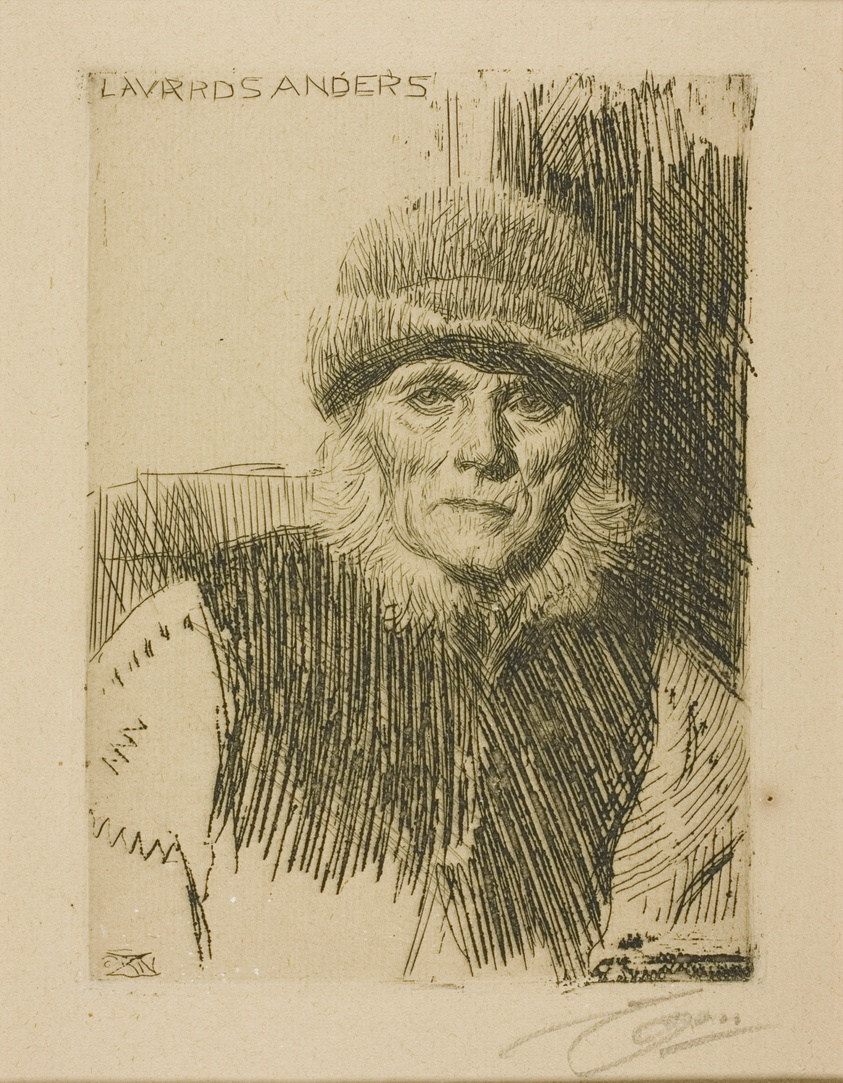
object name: Print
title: Dalecarlian Peasant (Lavards Anders)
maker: Anders Zorn (Swedish, 1860-1920)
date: 1919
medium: Etching on tan laid paper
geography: Sweden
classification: etching; print; prints and drawing